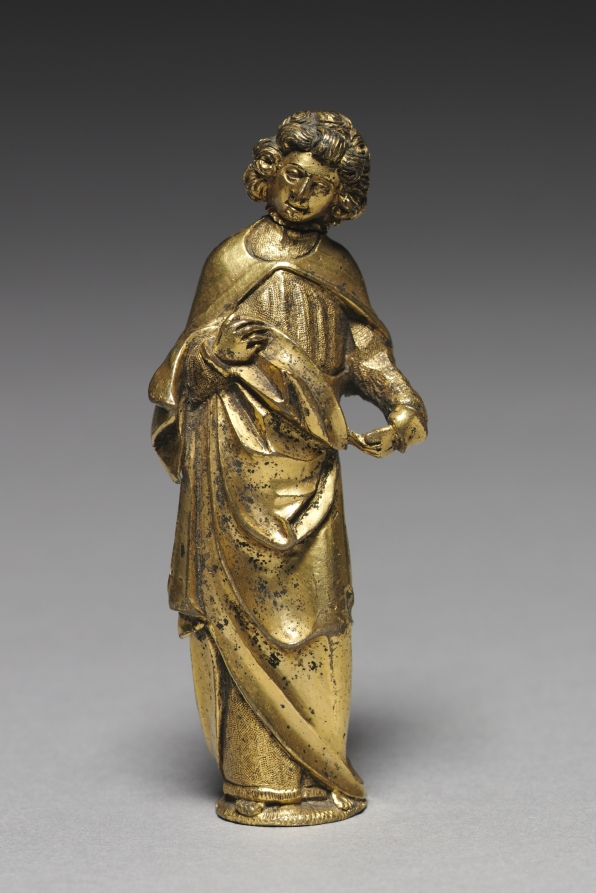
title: Mourning Saint John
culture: Germany, Franconia, late 15th century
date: late 1400s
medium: gilt bronze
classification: Sculpture